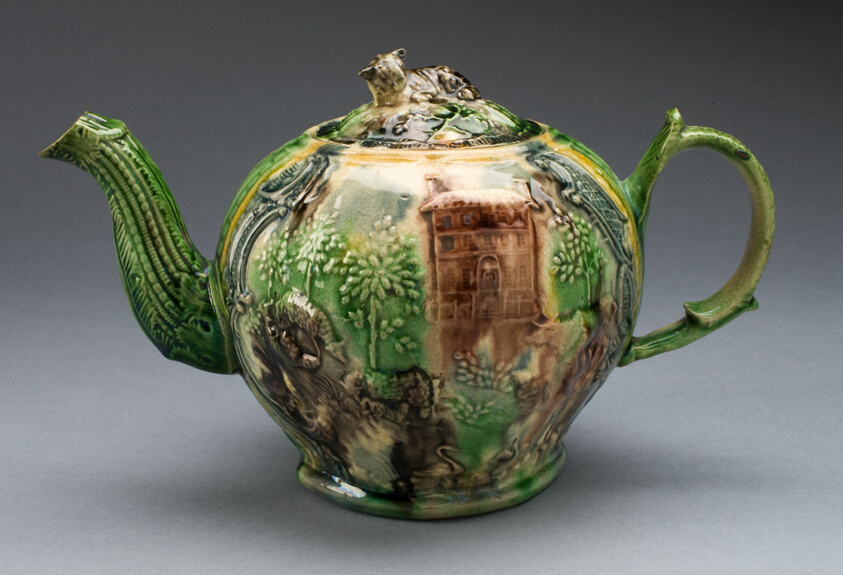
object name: Ceramics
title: Teapot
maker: Staffordshire, England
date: 1760/70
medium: Lead-glazed earthenware (creamware)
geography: Staffordshire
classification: teapot; ceramics; creamware; earthenware; european decorative arts; lead-glazed earthenware